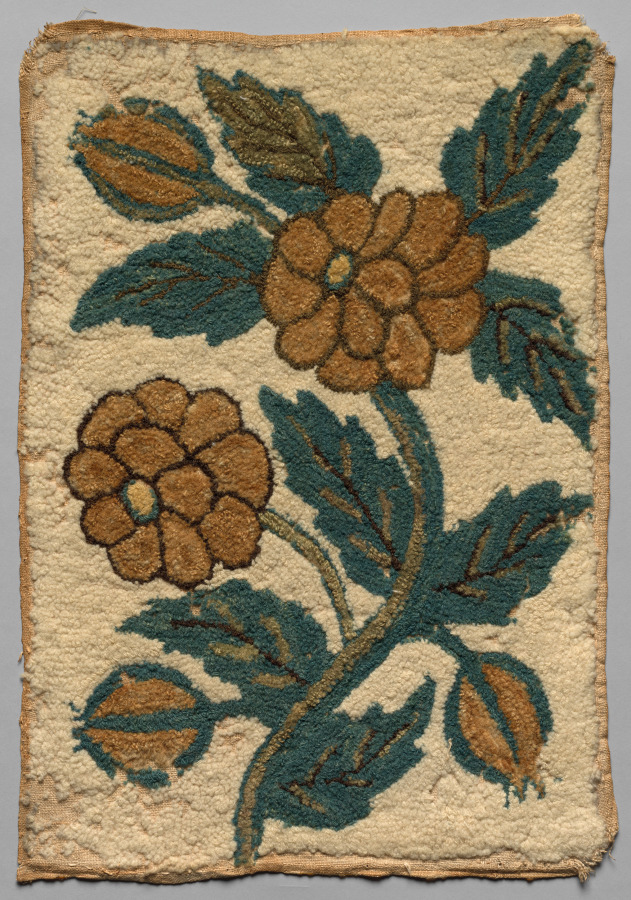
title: Hooked Panel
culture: America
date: 1700s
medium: hooked wool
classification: Embroidery